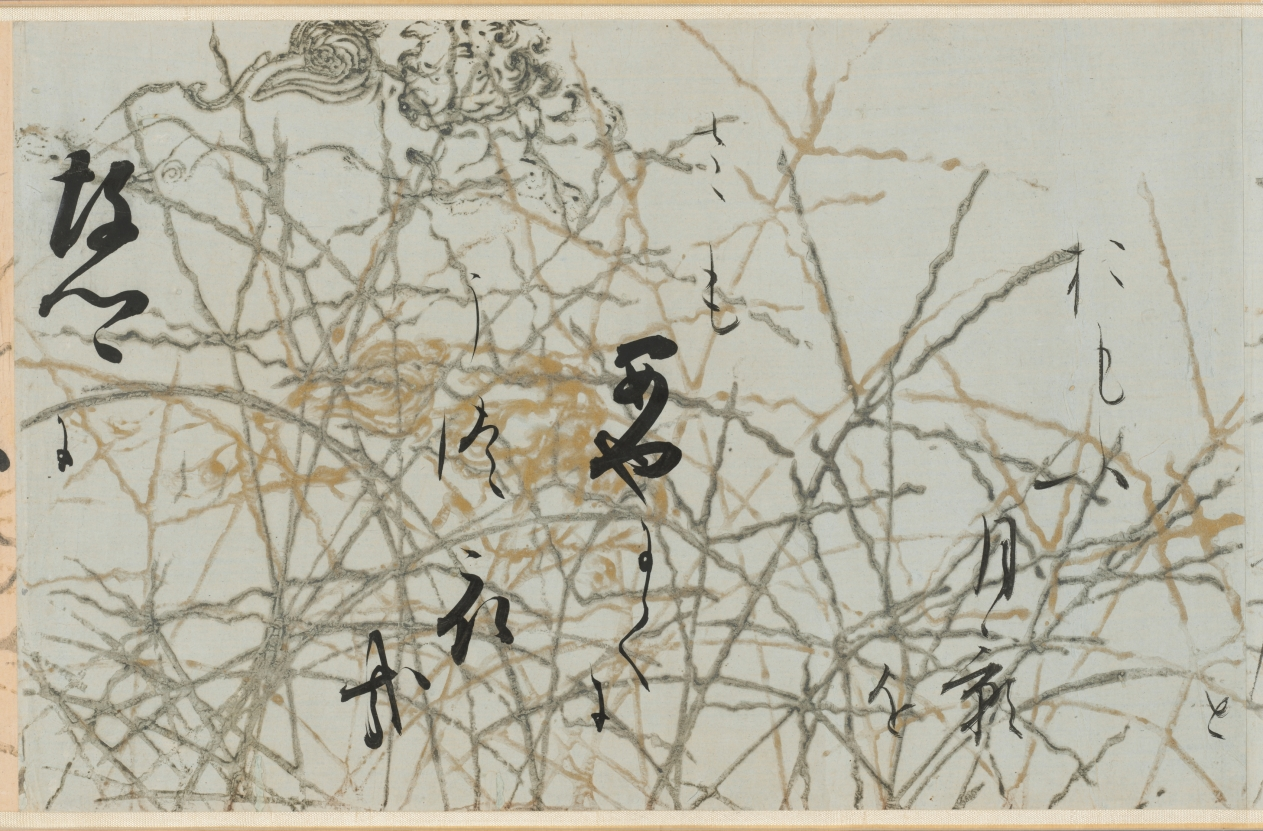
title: Selections from the New Collection of Japanese Poems from Ancient and Modern Times (Shinkokin wakashū) with Printed Designs of Chinese Lions and Crab Finger Grass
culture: Japan, Edo period (1615–1868)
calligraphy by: Hon'ami Kōetsu (Japanese, 1558–1637)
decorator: Tawaraya Sōtatsu (Japanese, c. 1570–c. 1640)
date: early 1600s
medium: handscroll; ink, gold, and silver on paper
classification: Calligraphy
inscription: Seal: 光悦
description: Hon’ami Kōetsu was a calligrapher and craftsman who frequently collaborated with the painter Tawaraya Sōtatsu, considered the first master of the Rinpa school. Kōetsu brushed seven poems from the autumn section of a poetry anthology onto dyed paper with motifs designed and printed in gold and silver by Sōtatsu.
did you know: Before becoming a master painter of screens, Tawaraya Sōtatsu painted fans.